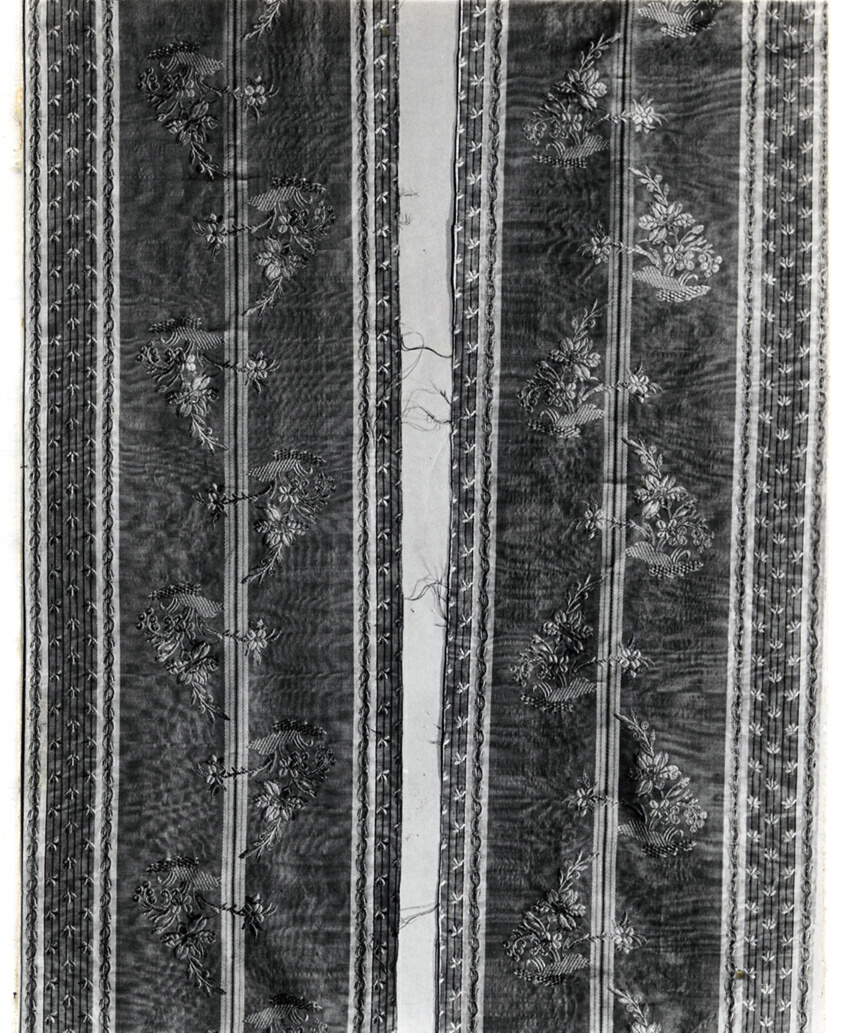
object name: Textile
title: Fragment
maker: France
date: Late 19th century (reproduction of 1760s pattern)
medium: Silk and wild silk, stripes of warp-float faced 7:1 satin weave with self-patterning ground weft floats and stripes of plain weave self-patterned by two-color complementary ground weft floats; woven on loom with Jacquard attachment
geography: France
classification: textile; weaving